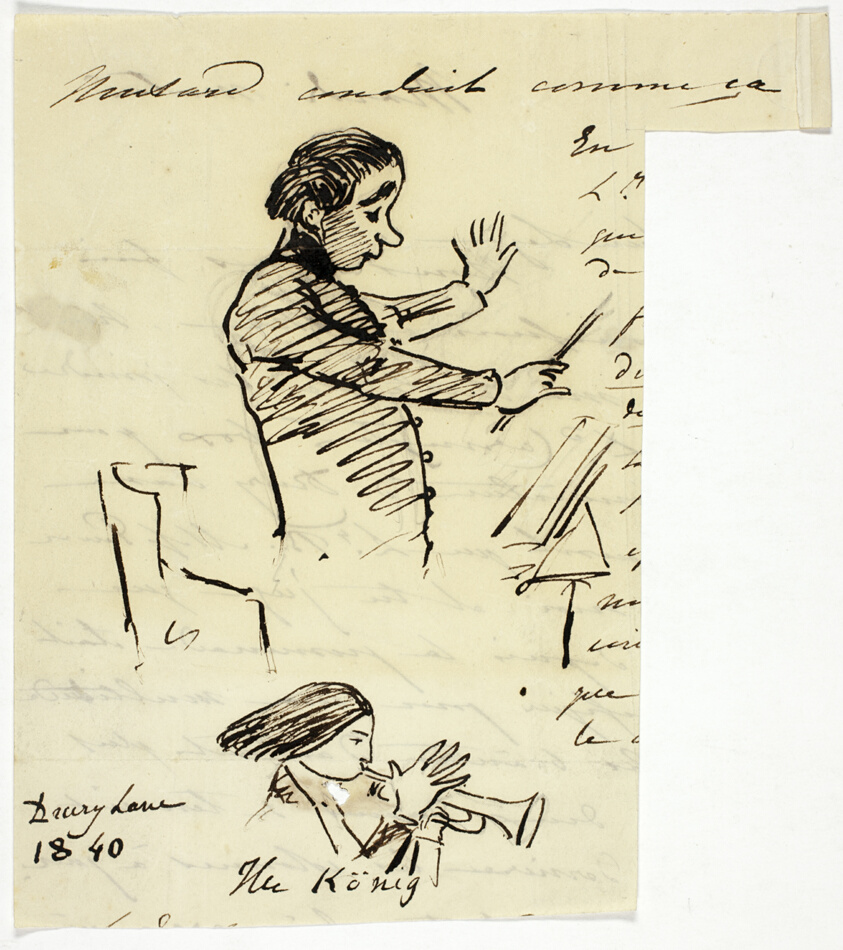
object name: Drawing and Watercolor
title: Sketches of Conductor and Trumpet Player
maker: Attributed to Alfred Edward Chalon; English, born Switzerland, 1780-1860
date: 1840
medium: Pen and brown ink on tan wove paper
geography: England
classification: pen and ink drawings; drawings (visual works); prints and drawing